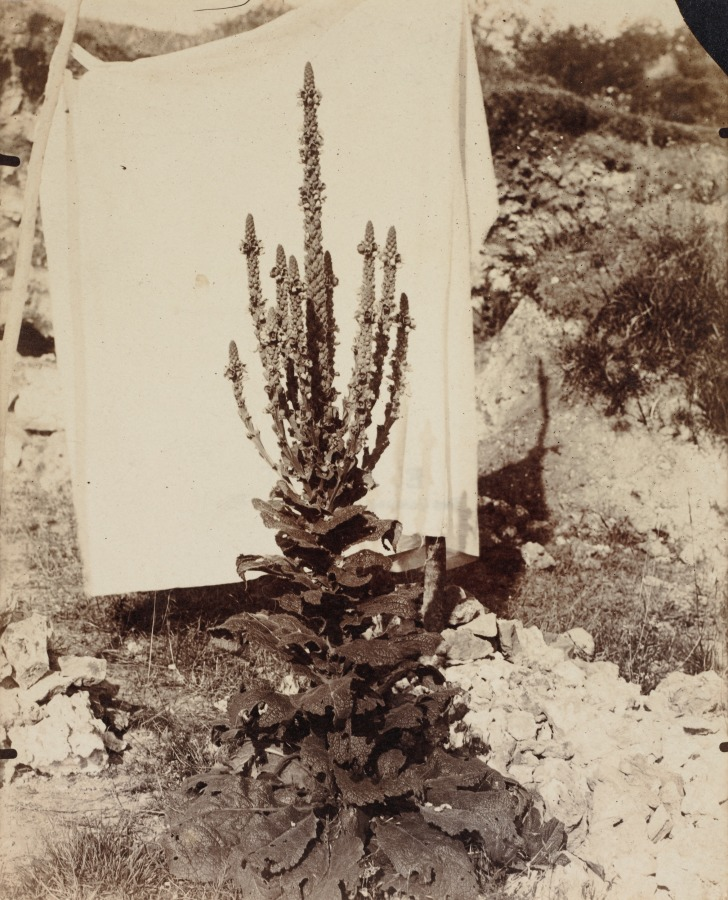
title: Mullein in Bloom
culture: France, 20th century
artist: Eugène Atget (French, 1857–1927)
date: c. 1897–1899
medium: albumen print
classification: Photograph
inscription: Written in pencil on verso: "Bouillon Blanc/En Fleur 133"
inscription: Black stamp on verso of print: E. Atget/Rue Campagne-Premié re, 17 bis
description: Atget produced architectural details, views of historic Paris, landscapes, and botanical images for use by painters and illustrators. Despite being a product of the 19th century, he was greatly admired by the avant-garde photographers of the 1920s. Modernists esteemed the straightforwardness of his photographs, while the Surrealists found inspiration in their evocative power. An artist or illustrator using this image of a common plant used in herbal remedies would have ignored the landscape background. But the Surrealists would have appreciated the unexpected, unintended surrealism of its odd juxtaposition of sheet, plant, and landscape.